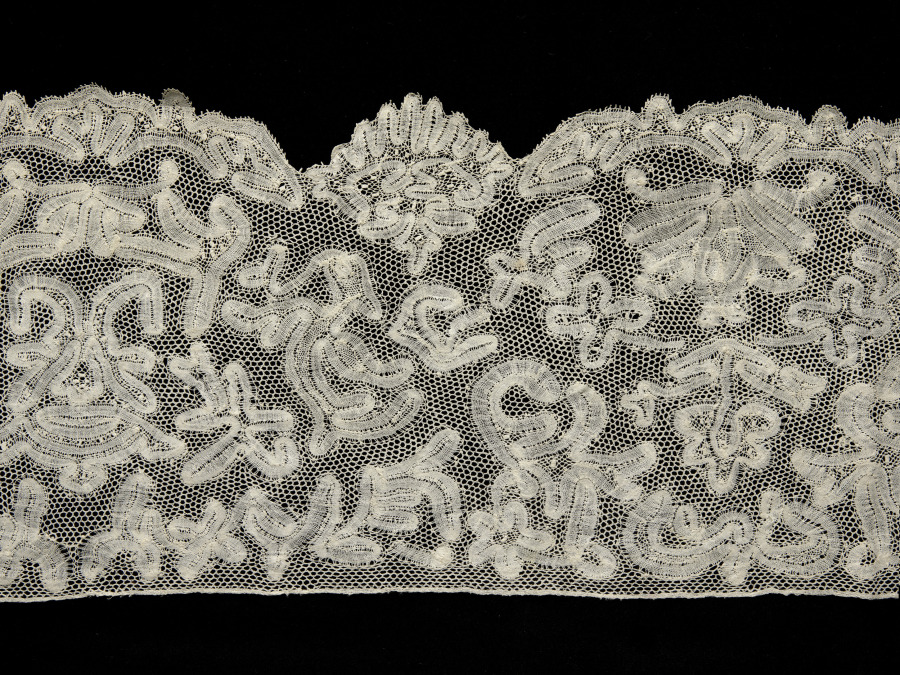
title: Fragment of Lace Flounce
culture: Italy, Abruzzi, Pescocostanzo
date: 1800s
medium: Linen: bobbin lace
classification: Lace